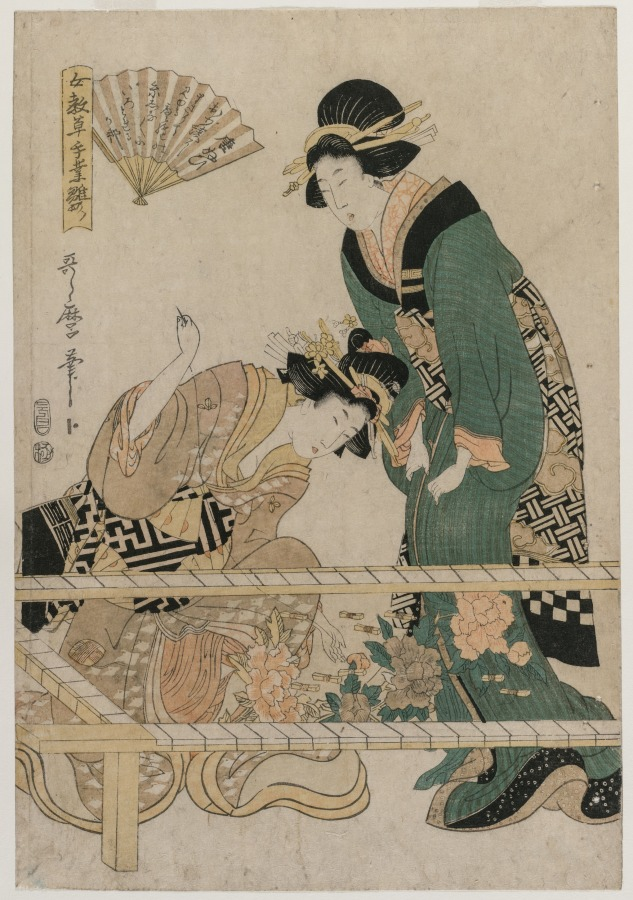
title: Chinese Embroidery (from the series Instructive Patterns for Women's Handicraft)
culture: Japan, Edo period (1615–1868)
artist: Kitagawa Utamaro II (Japanese, d. 1831?)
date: 1808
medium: color woodblock print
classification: Print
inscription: Signature: Utamaro hitsu Publisher: Yamaguchiya Tobei (emblem) Censorship Seal: kiwame